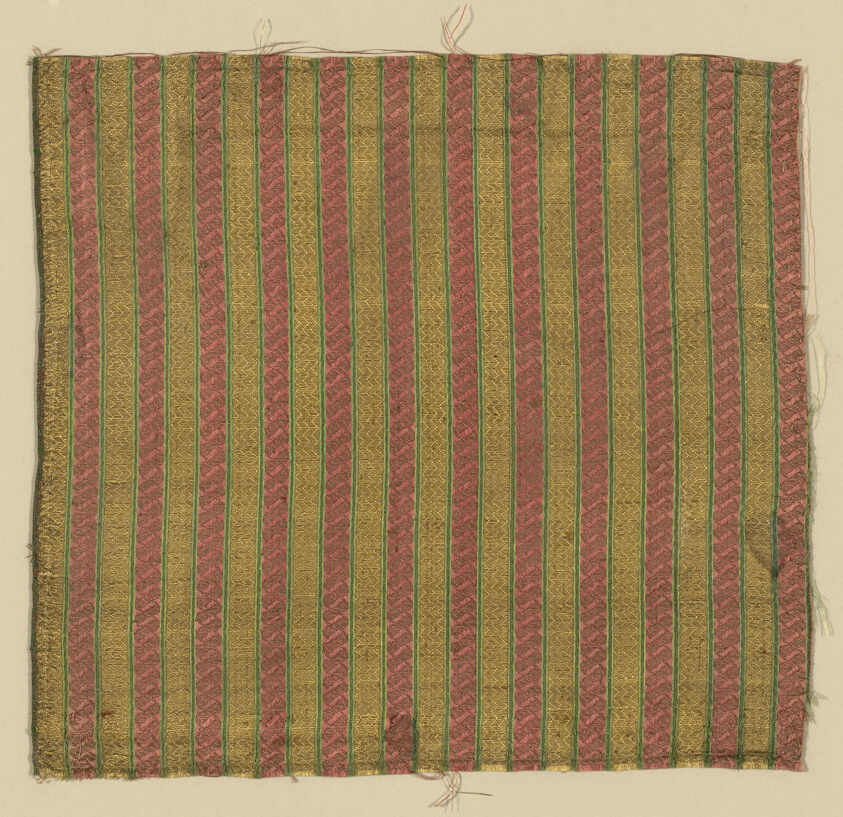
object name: Textile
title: Panel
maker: Iran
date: 19th century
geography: Iran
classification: textile; weaving